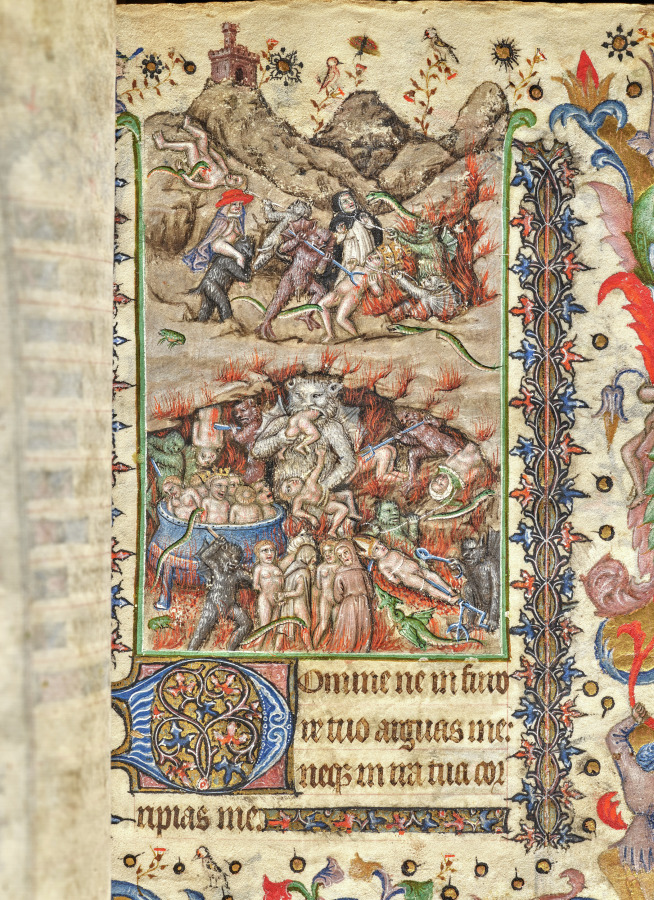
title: Hours of Charles the Noble, King of Navarre (1361-1425): fol. 106r, Last Judgment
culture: France, Paris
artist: Master of the Brussels Initials and Associates (French)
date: c. 1405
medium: ink, tempera, and gold on vellum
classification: Bound Volume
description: This precious volume was obviously highly prized by its owner, the French-born King of Navarre, who had his coat of arms painted on no less than twenty folios. Rather than directly commissioning this manuscript from a specific workshop, it seems that Charles the Noble acquired his book of hours -- perhaps ready-made for the luxury market -- while on a trip to Paris in 1404-05. A collaborative effort, six painting styles are evidenced within the pages of this codex, those of two Italians, two Frenchmen, and two Netherlanders. The painter who was responsible for the planning and decoration of the book, and who produced seventeen of the large miniatures, was a Bolognese artist known as the Master of the Brussels Initials. His principal assistant, responsible for most of the borders, was a Florentine who signed his name "Zecho" da Firenze on folio 208 verso.